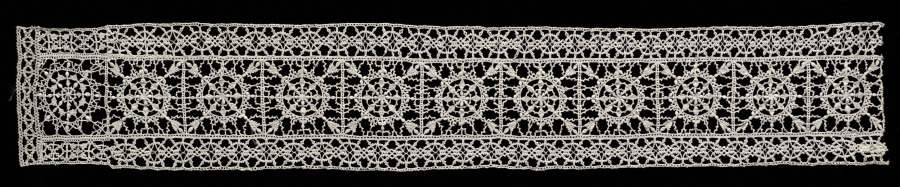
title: Lace Band or Border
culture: Italy, Genoa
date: 1500s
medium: Bobbin lace (needle lace, reticella design)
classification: Lace